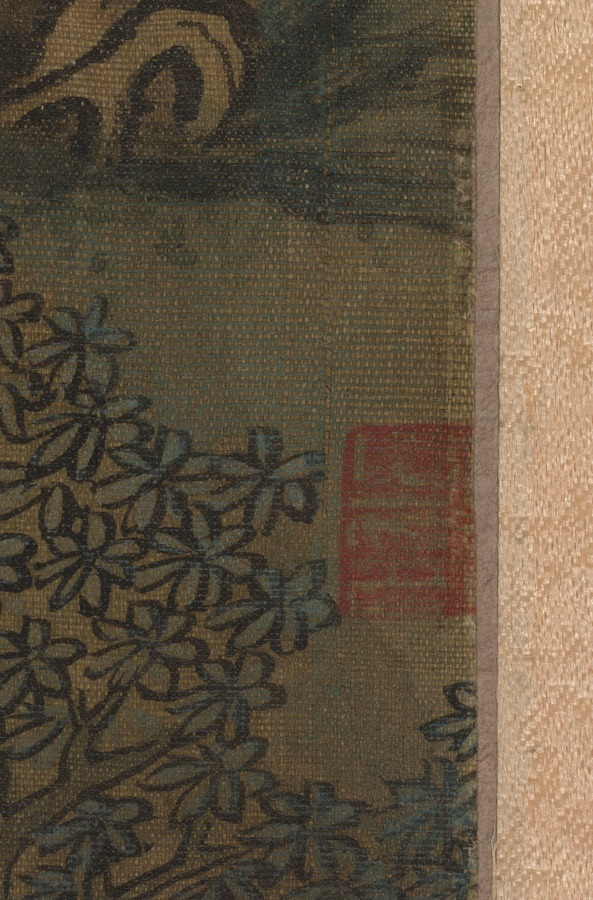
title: Court Ladies in the Imperial Palace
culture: China, Yuan dynasty (1271-1368)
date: 1271–1368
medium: hanging scroll, color on silk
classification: Painting